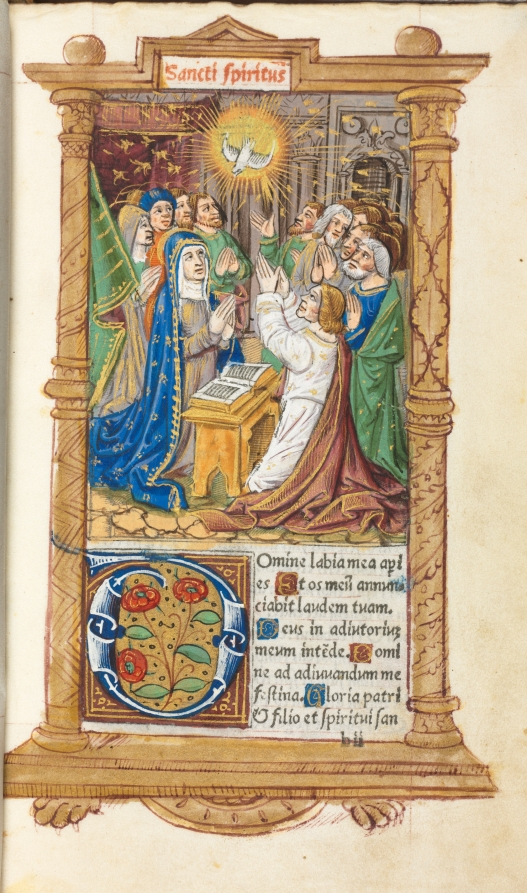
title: Printed Book of Hours (Use of Rome): fol. 58r, Pentecost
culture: France, Paris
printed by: Guillaume Le Rouge (French, Paris, active 1493–1517)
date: 1510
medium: 112 Printed folios on parchment, bound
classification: Bound Volume